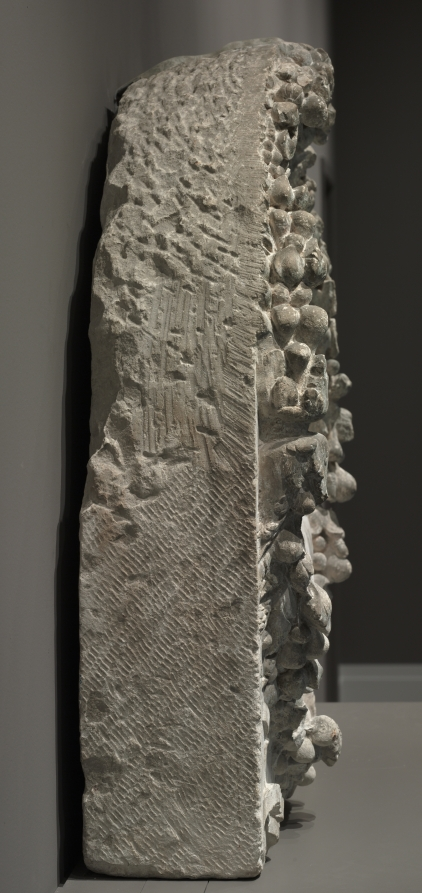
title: Julius Caesar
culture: Italy, Florence, 15th century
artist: Mino da Fiesole (Italian, c. 1430–1484)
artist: garland by Mino da Fiesole and Workshop (Italian, c. 1430–1484)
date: c. 1455–60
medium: marble with traces of bole (red clay) and limestone with traces of paint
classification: Sculpture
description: Renowned Roman general and statesman Julius Caesar (100–44 BCE) appears here as a political rather than military leader, worn by the burdens of office, with carefully described signs of aging. Mino probably used ancient coins from the collection of the Medici, Florence's ruling family, as his starting point for this sculpture. However, the complex carving, the clinging drapery, and the psychological intensity all characterize the inventiveness Renaissance artists brought to classical subject matter. In this case, Caesar offered an important model for leadership, masculinity, and composure. The garland is clearly by a different hand, but passages, such as the ribbons and flowers in low relief, correspond to details found in other decorative carvings from Mino's workshop. Initially, the limestone setting was probably put into a wall, perhaps in a lunette over the door, from which it was later removed. However, the relationship between the garland and the relief has not yet been clarified and is the subject of ongoing research.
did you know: Traces of paint on this white marble relief indicated that it was once brightly painted.